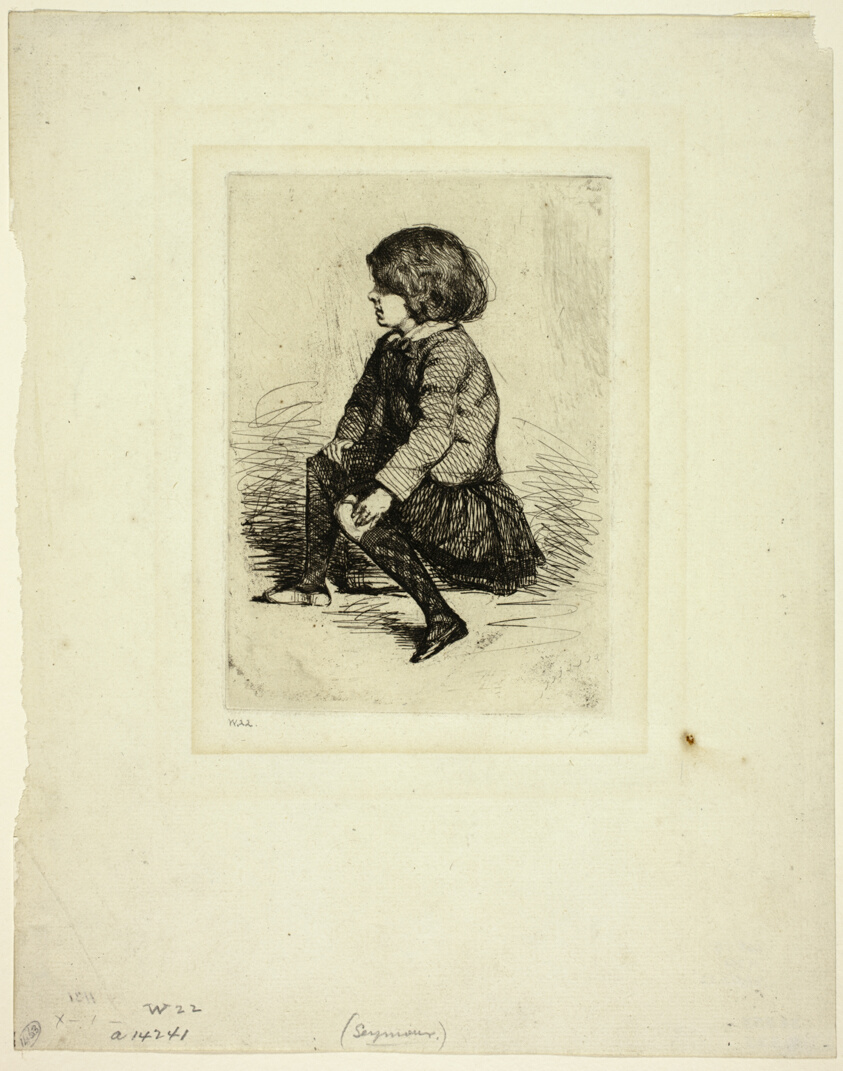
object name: Print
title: Seymour Haden, Jr, Seated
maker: James McNeill Whistler (American, 1834-1903)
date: 1857/58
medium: Etching with foul biting in black ink on off-white laid paper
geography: United States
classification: etching; foul biting; print; prints and drawing; paper